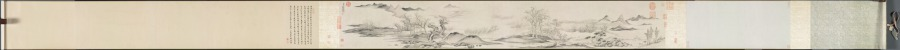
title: Water Village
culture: China, Ming dynasty (1368–1644)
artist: Wen Boren (Chinese, 1502–1575)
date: 1570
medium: handscroll; ink and light color on paper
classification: Painting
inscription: 隆慶庚午秋仿趙文敏筆. 五峰文伯仁 [印] 五峰山人; 文伯仁印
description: In the autumn of 1570, Wen Boren painted this seemingly unemotional scene of low-lying marshlands with a chain of rounded mountains in the background. A fishing boat is nestled on the shore near the village. Although paths and bridges traverse the landscape, only two people are visible in the stillness. From the restrained atmosphere of this landscape, one would never guess that Wen Boren was known as the “bad boy” of the Wu School for his explosive temper. As a younger man, he was even embroiled in a contentious lawsuit with his own uncle, Wen Zhengming (1470–1559), a master of Ming dynasty painting with whom he had trained. The ideal of the scholar-painter, or literati, was that an artist’s moral character is reflected in his paintings, so there was great incongruity between Wen Boren’s difficult personality and his restrained landscapes. A contemporary, Wang Shizhen, wrote this about him: "This gentleman is prone to behave odiously and screamed accusations at people. How is it possible for him to carry in his bosom such a wealth of scenic wonders?" Who knows what effort it took to subdue his fractious spirit to project an image of coolness and refined taste in his paintings?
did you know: A foreground tree has an eccentric twisting silhouette and pepper-dot "halo" of leaves.